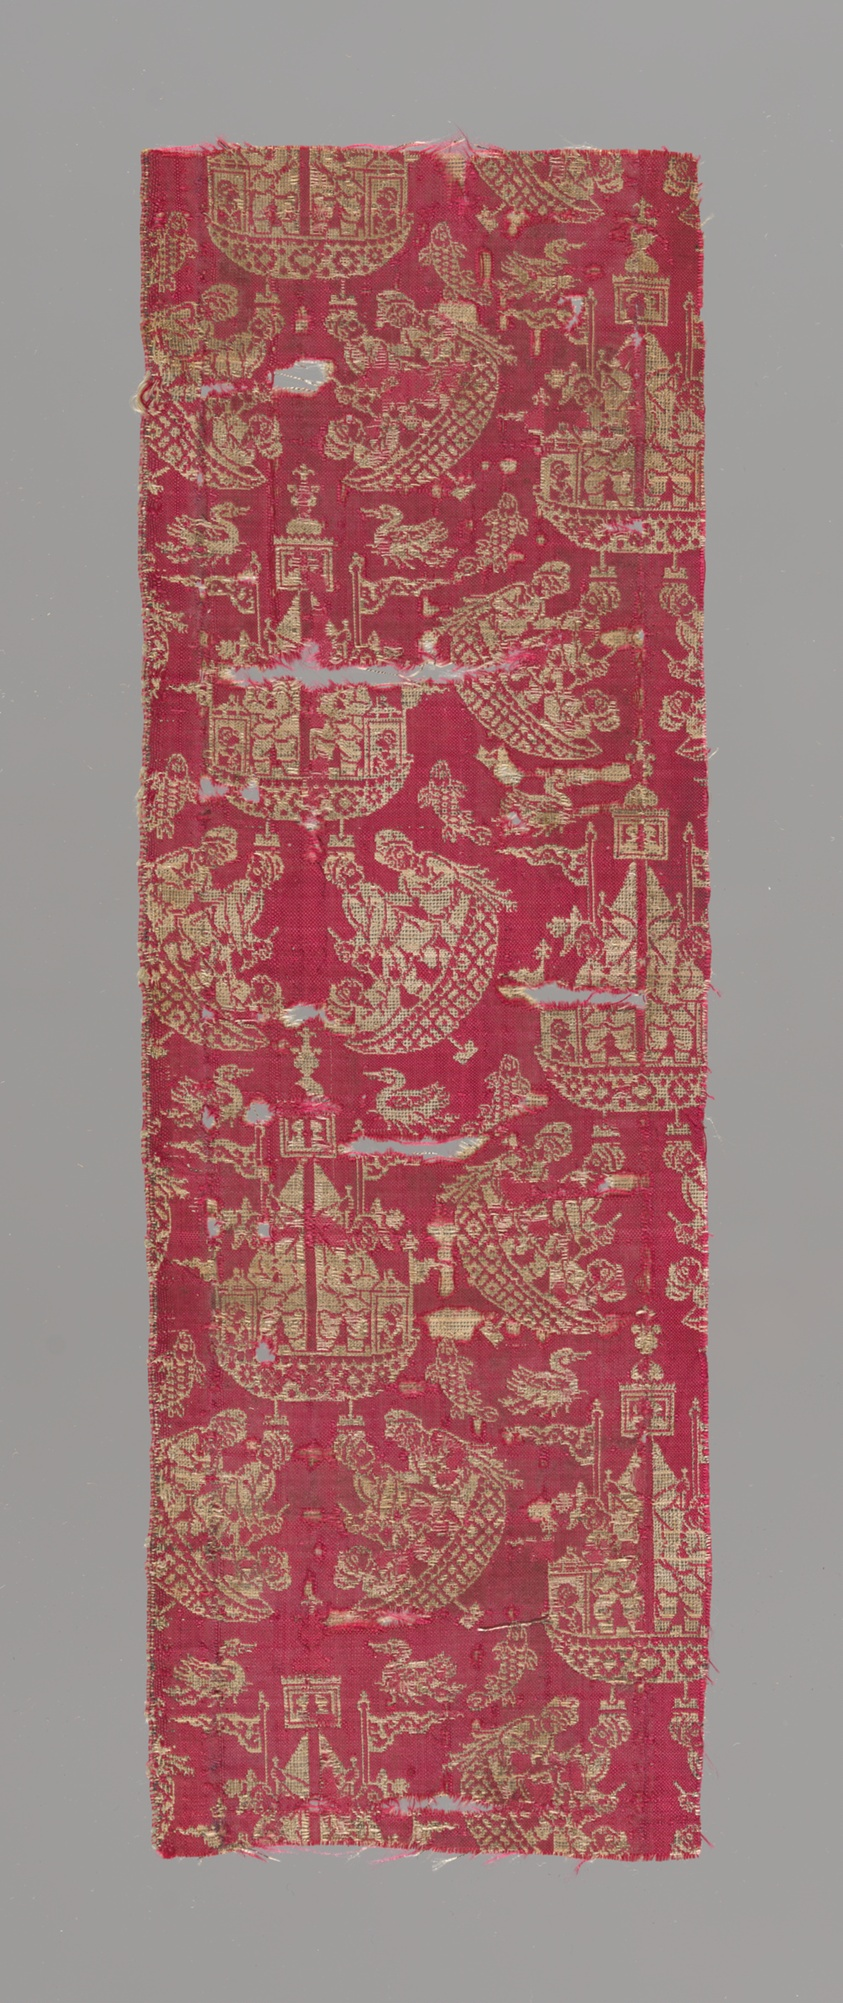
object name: Textile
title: Fragment (Dress Fabric)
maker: Iran (Persia) or India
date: 1601/25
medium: Silk, double cloth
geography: Persia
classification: textile; weaving